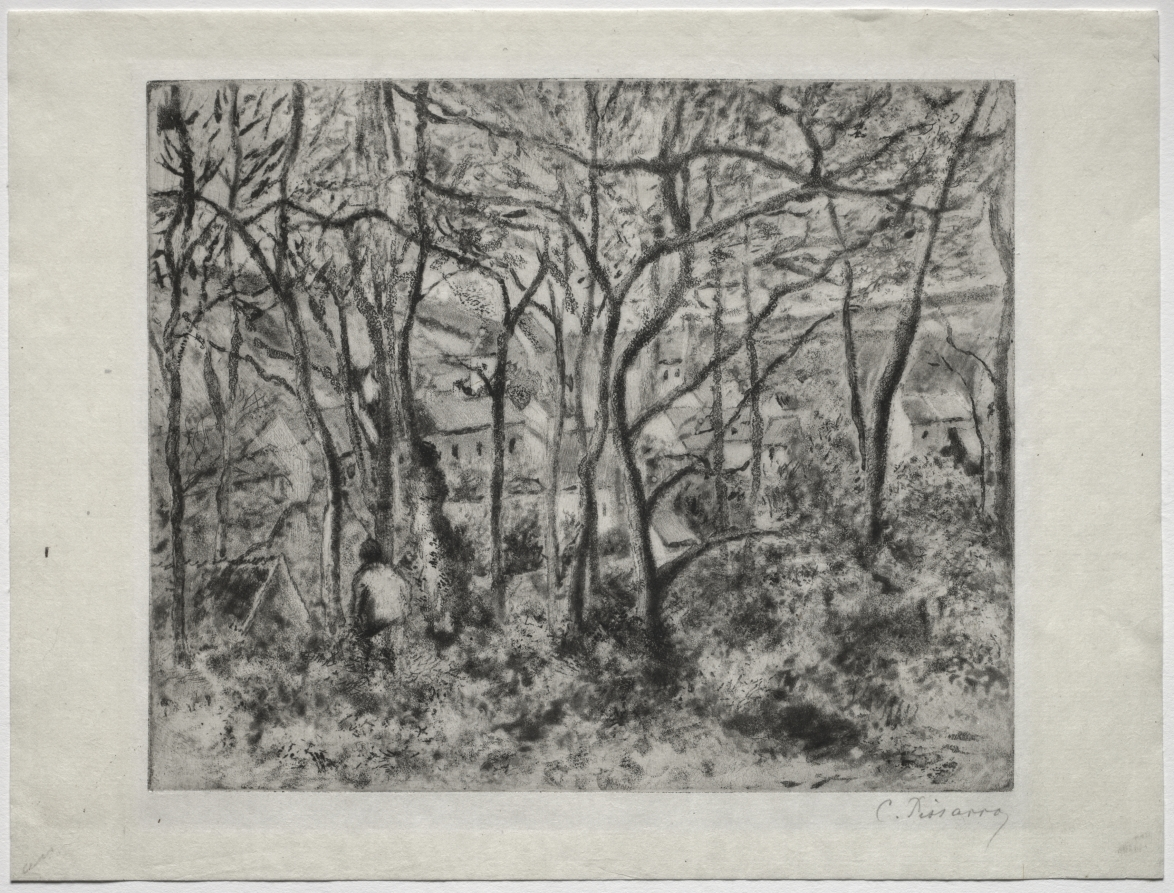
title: Wooded Landscape at L'Hermitage, Pontoise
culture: France, 19th century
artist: Camille Pissarro (French, 1830–1903)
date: 1879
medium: softground, aquatint, and drypoint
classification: Print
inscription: lower right, in graphite: C. Pissarro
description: Camille Pissarro depicted this view of Pontoise, the Parisian suburb where he lived at the time, using a range of etching techniques. He evoked the effects of natural light amid the shadowy forest by combining grainy aquatint with softground—a process that creates loose, painterly lines and tone. Although primarily known as painters, many of the Impressionists took up printmaking, developing new techniques to translate the effects of natural light. Pissarro, especially, experimented with etching, working extensively with the technique alongside Edgar Degas around the time this print was made.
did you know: Pissarro made this print for the journal Le Jour et la nuit that he planned with Edgar Degas, but was never realized.